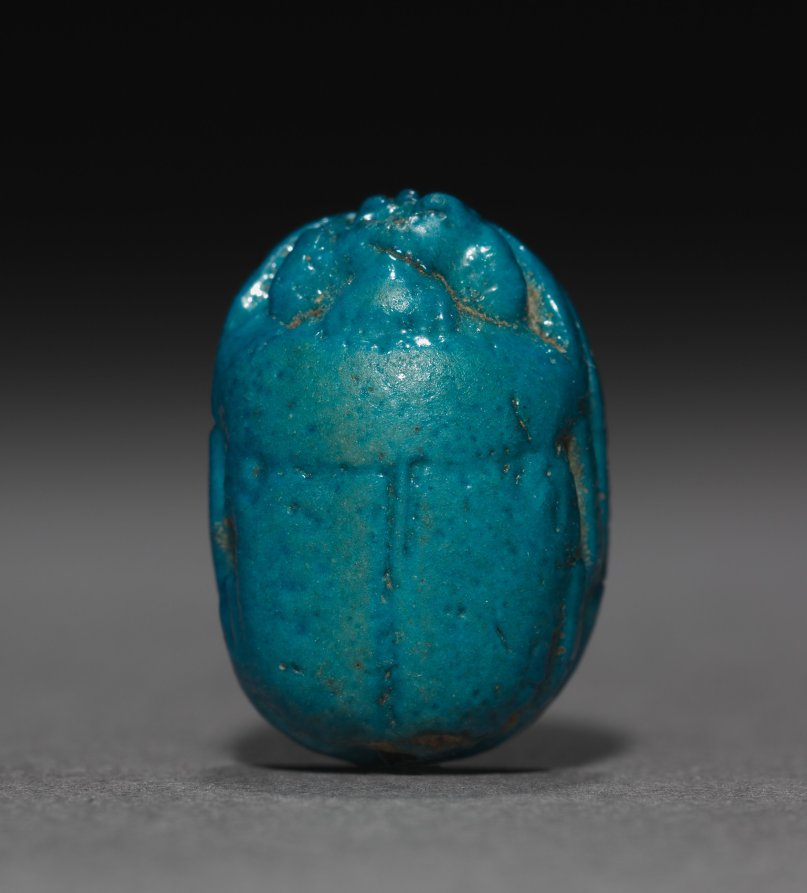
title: Amen-Ra Scarab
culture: Egypt, New Kingdom (1540–1069 BCE), Dynasties 18–19 or later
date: 1540–1186 BCE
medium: blue-glazed faience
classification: Scarabs